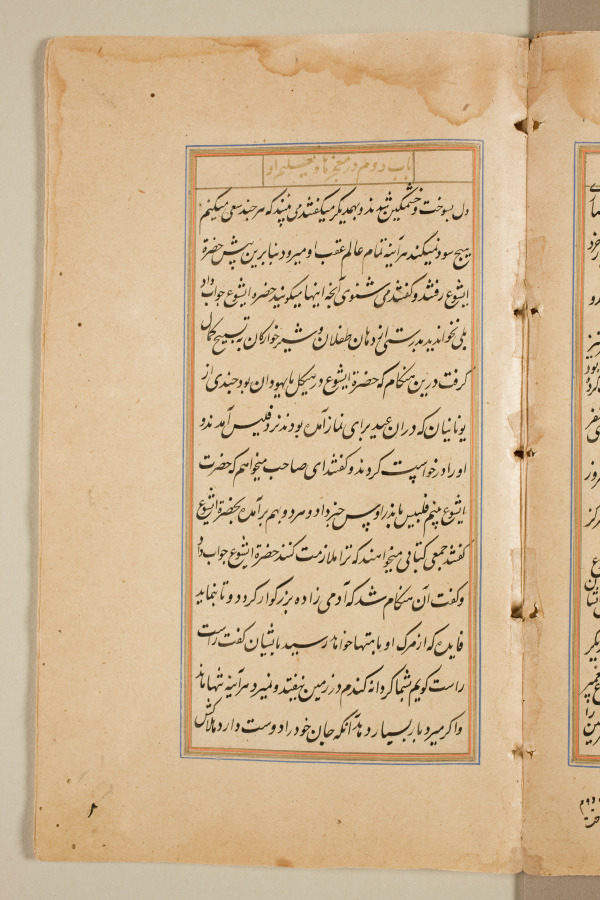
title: Text page from a Mirror of Holiness (Mir’at al-quds) of Father Jerome Xavier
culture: Mughal India, Allahabad, made for Prince Salim (1569–1627)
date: 1602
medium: Ink and gold on paper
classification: Manuscript